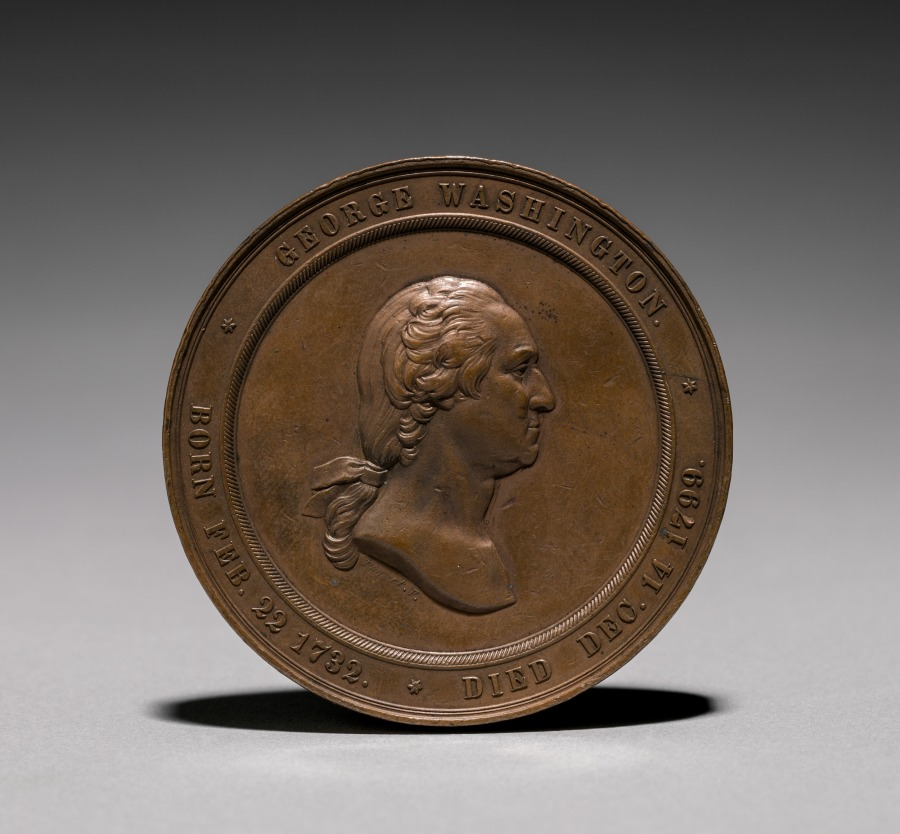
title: Medal: George Washington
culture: France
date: 1860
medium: bronze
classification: Metalwork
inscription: George Washington, Born Feb. 22, 1732. Died Dec. 14, 1799.